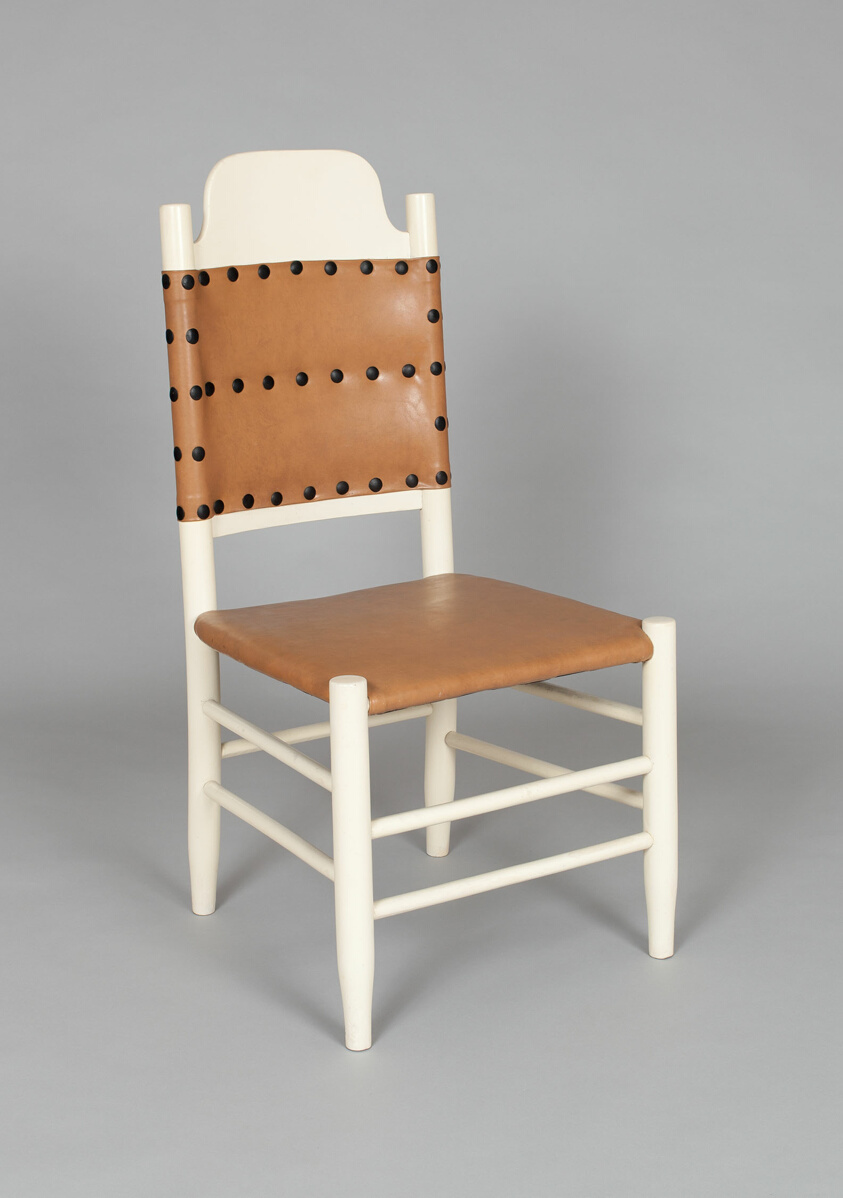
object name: Furniture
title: Side Chair (part of a set)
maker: Designed by Louis Comfort Tiffany (American, 1848–1933); Made by J. Matthew Meier (American, 1830–1913) and Ernest Hagen (American, 1822–1889); New York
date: c. 1885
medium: Painted maple, with vinyl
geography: New York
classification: seating; furniture; american decorative arts; american arts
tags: furniture